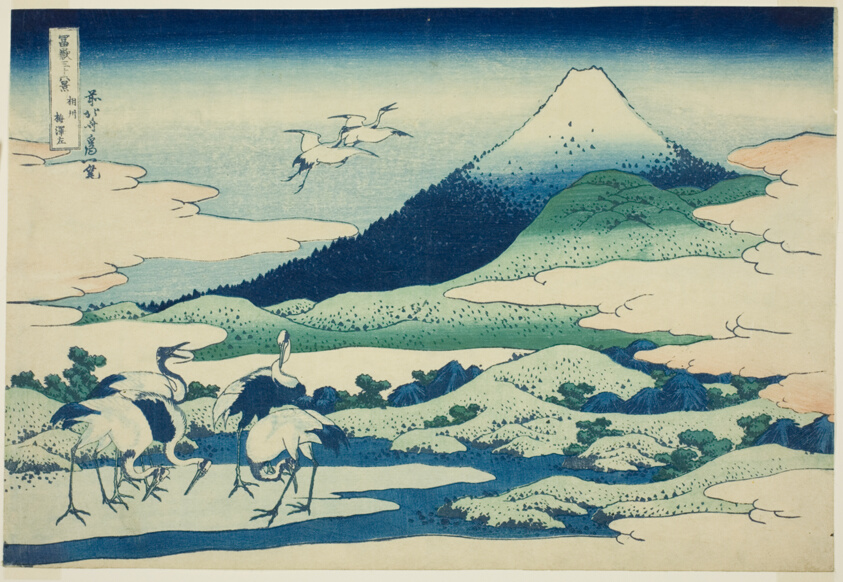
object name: Print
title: Umezawa Marsh in Sagami Province (Soshu Umezawa hidari), from the series "Thirty-six Views of Mount Fuji (Fugaku sanjurokkei)"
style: Japanese (culture or style)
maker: Katsushika Hokusai 葛飾 北斎; Japanese, 1760-1849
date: c. 1830/33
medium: Color woodblock print; oban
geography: Japan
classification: woodblock print; print; asian art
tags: landscapes